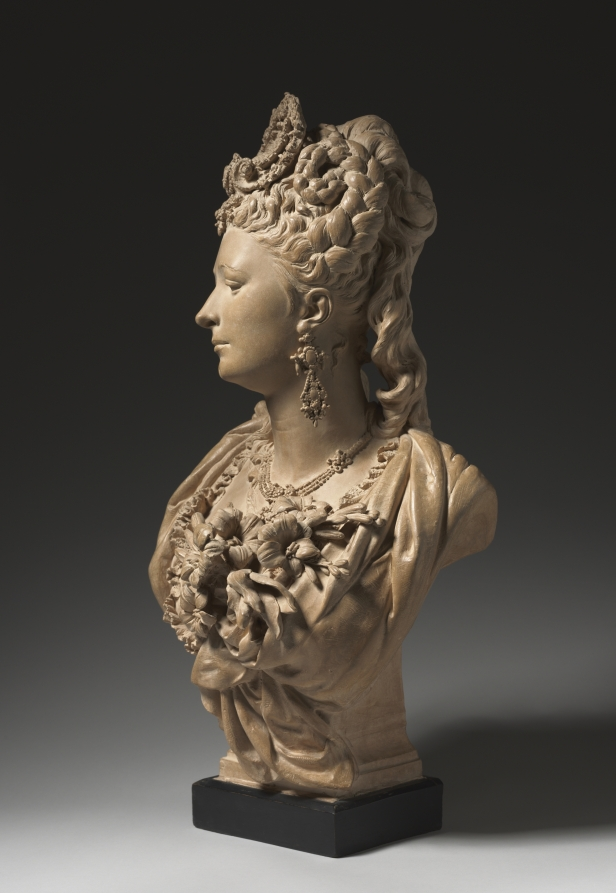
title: Portrait Bust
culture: France, 19th century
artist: Albert-Ernest Carrier-Belleuse (French, 1824–1887)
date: c. 1865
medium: terracotta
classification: Sculpture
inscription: incised in the clay on the back: "A. Carrier"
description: Among the artists who reacted against the static poses of neoclassical art, Carrier-Belleuse drew inspiration from the opulence and excess of Rococo portraiture of the 1700s. This bust resembles one of Napoleon III's mistresses, Marguerite Bellanger, whose features the artist is known to have borrowed for his female busts. Carrier-Belleuse received commissions from Napoleon III, ruler of France from 1852 to 1870, and contributed to the sculptural decorations of the Louvre and Opera Garnier in Paris.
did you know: The possible muse for this bust, Virginia Oldonia, was a countess know for her drama and costumes.